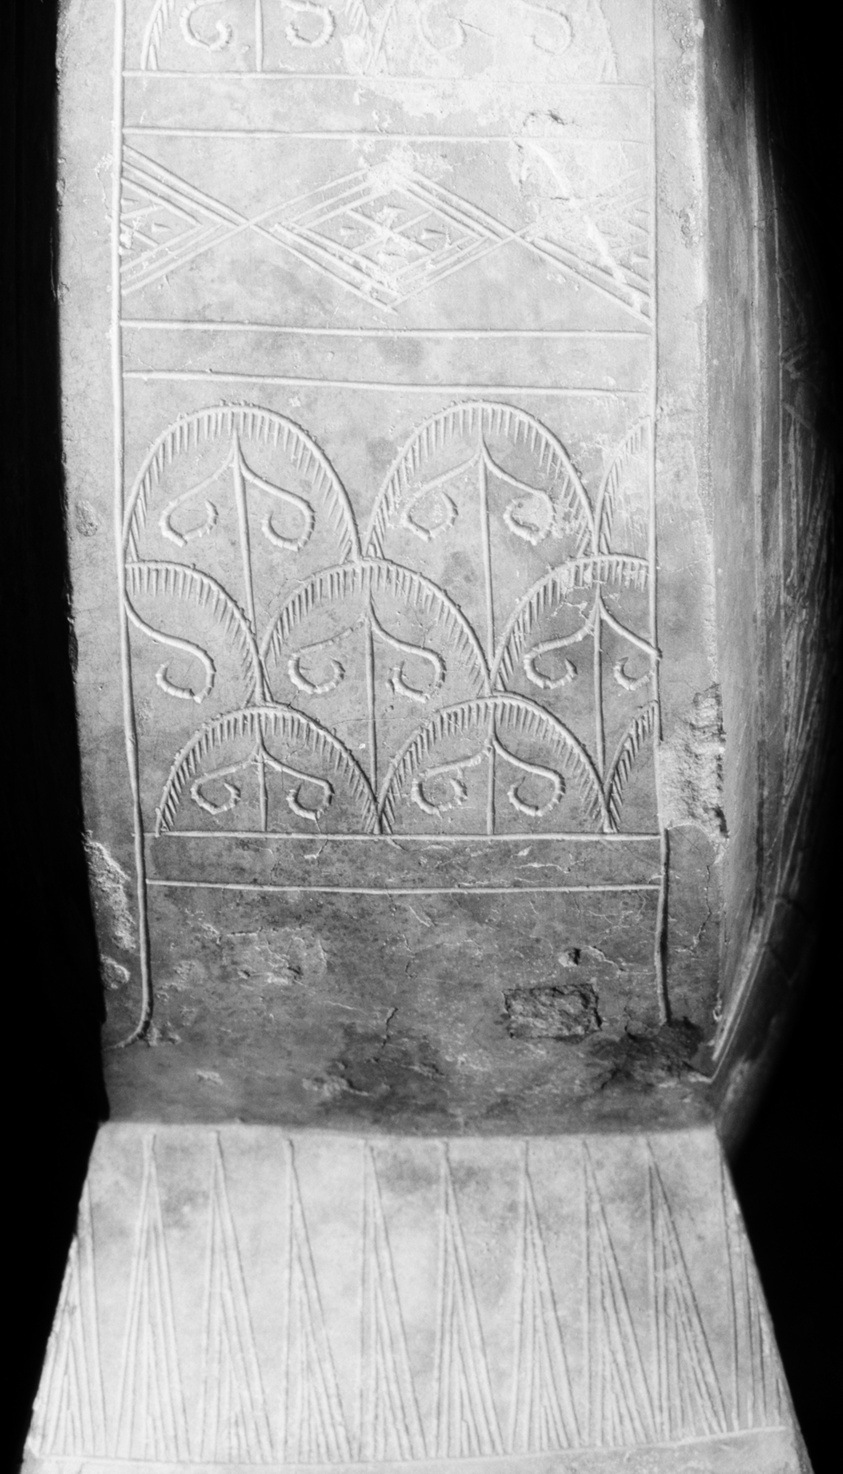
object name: Vessel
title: Wine Flask (Bian Hu)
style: Chinese (culture or style)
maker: China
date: Han dynasty (206 B.C.–A.D. 220), 1st century B.C./A.D.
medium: Bronze with incised decoration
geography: China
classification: bronze; metal; vessel; asian art